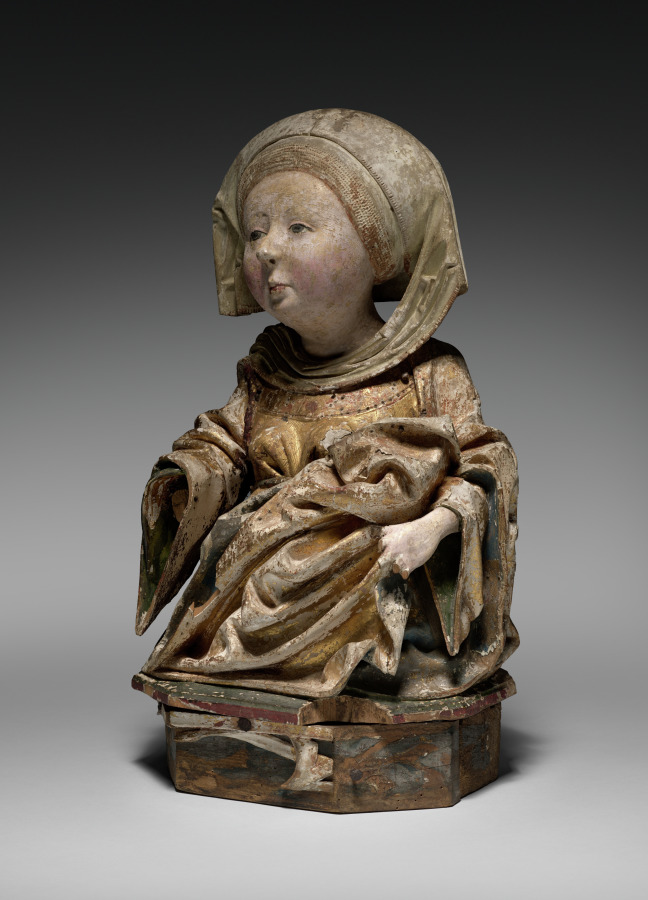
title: Female Bust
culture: Austria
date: c. 1470–1500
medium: Painted and gilded lindenwood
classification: Sculpture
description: This female bust is part of a series of three in the museum's collection. The identity of the figures has been speculated by scholars but without resolution. Because this and the other female busts in the series do not retain their attributes, it is difficult to know their original purpose. It is possible that they may have once formed a group of female saints from the predella of a large altarpiece. Since the sculpture is not carved in the round, this hypothesis has merit. Another recent proposal is that this and the other sculptures may be from a series of female busts representing the wise and foolish virgins referenced in Matthew 25:1-13, a parable by Jesus admonishing listeners to be spiritually prepared.